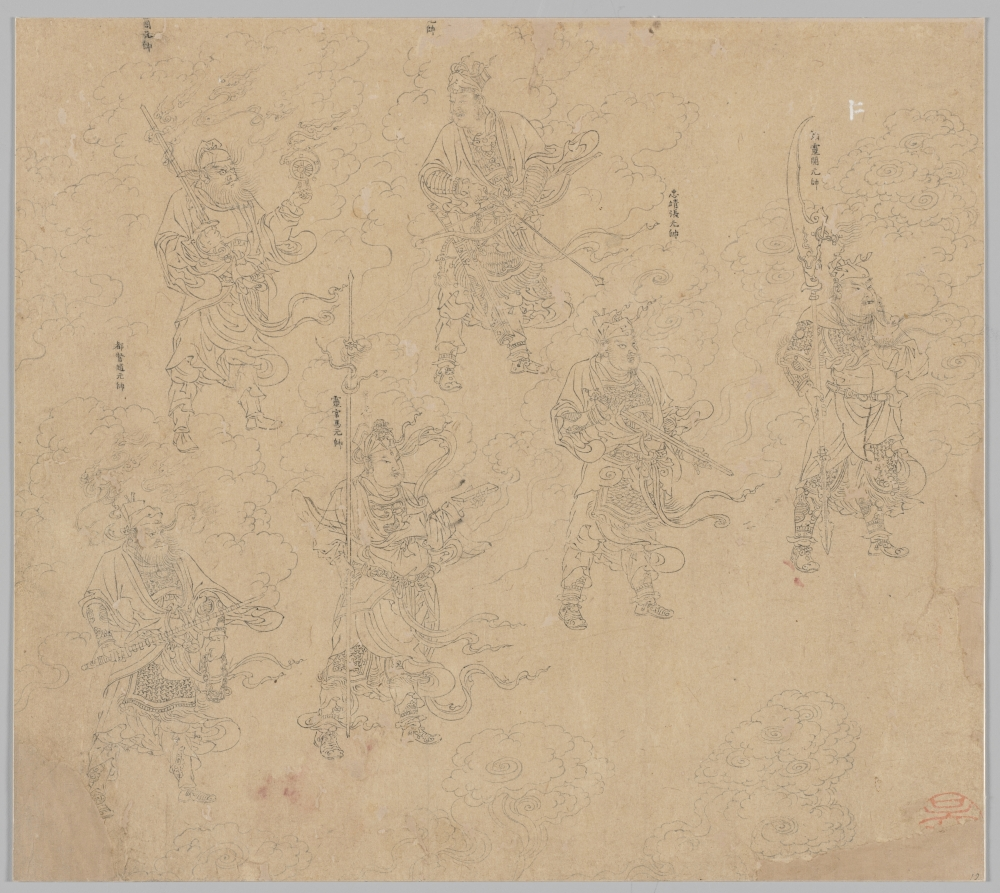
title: Album of Daoist and Buddhist Themes: Procession of Daoist Deities: Leaf 12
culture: China, Southern Song dynasty (1127-1279)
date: 1200s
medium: Album, ink on paper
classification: Painting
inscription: 朗靈關元帥; 忠靖張元帥; 元帥; 靈官馬元帥; 風輪周元帥; 都督趙元帥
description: This section of the Daoist pantheon depicts six generals, five of whom are identifiable by inscriptions. Starting from the right, they are Guan Yü 關羽, Zhang Bo 張渤, a general whose label has been lost, Ma Lingyao 馬靈耀, Zhou Guangze 周廣澤, and Zhao Gongming 趙公明. The generals, clad in military gear and wielding weapons, command spirit armies to intimidate and destroy demons that cause sickness and misfortune.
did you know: At far left, the God of Wealth Zhao Gongming holds a golden rod.